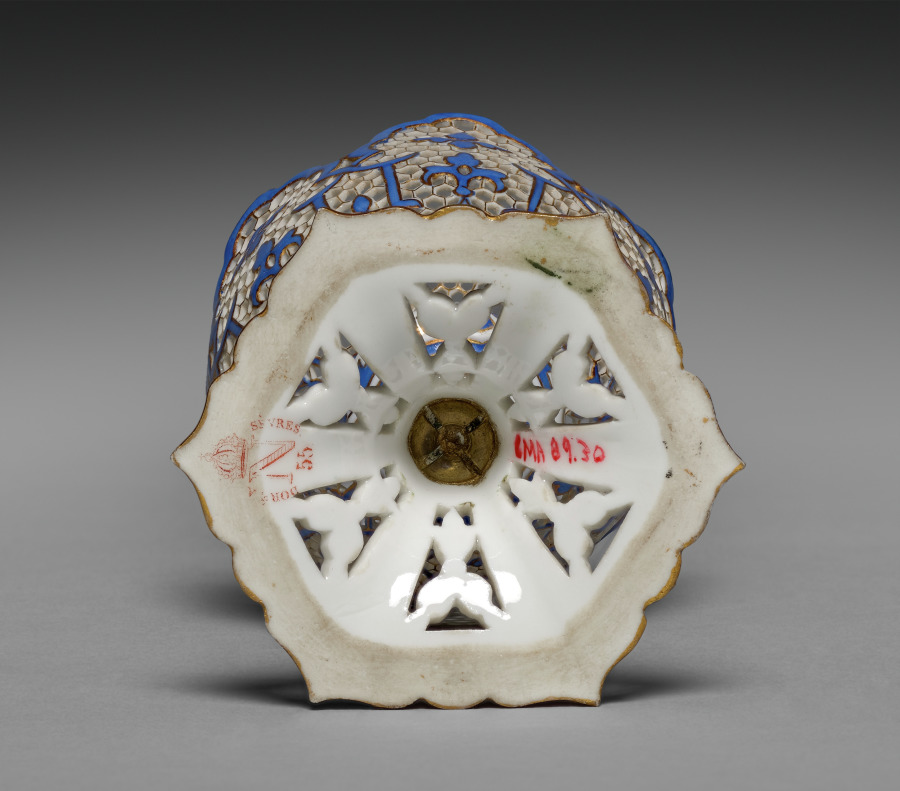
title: Cupholder (Zarf)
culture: France, Sèvres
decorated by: Guyonnet (French)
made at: Sèvres Porcelain Factory (French, est. 1756)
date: c. 1848–55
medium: hard-paste porcelain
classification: Ceramic